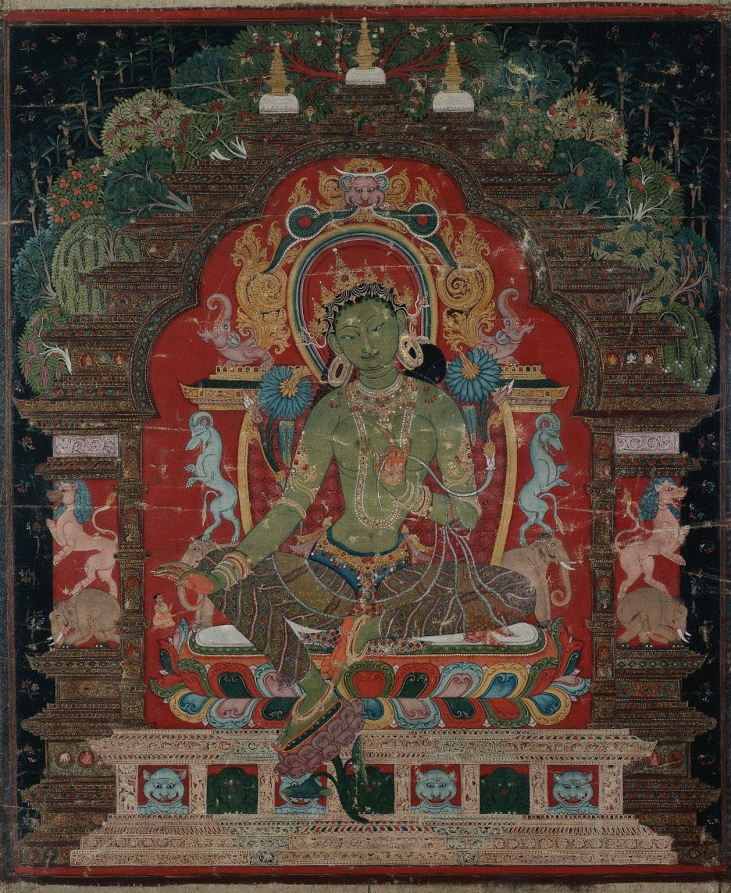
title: Green Tara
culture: Central Tibet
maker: attributed to Aniko (Nepalese, active in Tibet mid- to late 1200s)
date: c. 1260s; mounted, 2020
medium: thangka; gum tempera, ink, and gold on sized cotton; mount: silk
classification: Painting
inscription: Om Ah Hum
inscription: om tare tutare ture svaha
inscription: Om Ah Hum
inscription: Om Ah Hum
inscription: om ah sarva vyida svaha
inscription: ye dharmā hetuprabhavā he- tuṃ teṣāṃ tathāgato hy avadat teṣāṃ ca yo nirodha evaṃvādī mahāśramaṇaḥ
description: For Tibetans, Green Tara is one of the preeminent figures of their Buddhist faith, a radiant savioress who embodies the female form of the perfect, enlightened mind. The Green Tara in the Cleveland thangka—a Tibetan devotional painting on cloth—specifically dispels fear and provides protection, just like her mantra inscribed on the back side of the painting. Her green color and fear-not gesture link her to the cosmic Buddha of the North, enshrined above her head. Most scholars agree that this work was painted by the celebrated Nepalese artist known as Aniko.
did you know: The tiny monastic figure under Green Tara's right hand commissioned the painting.